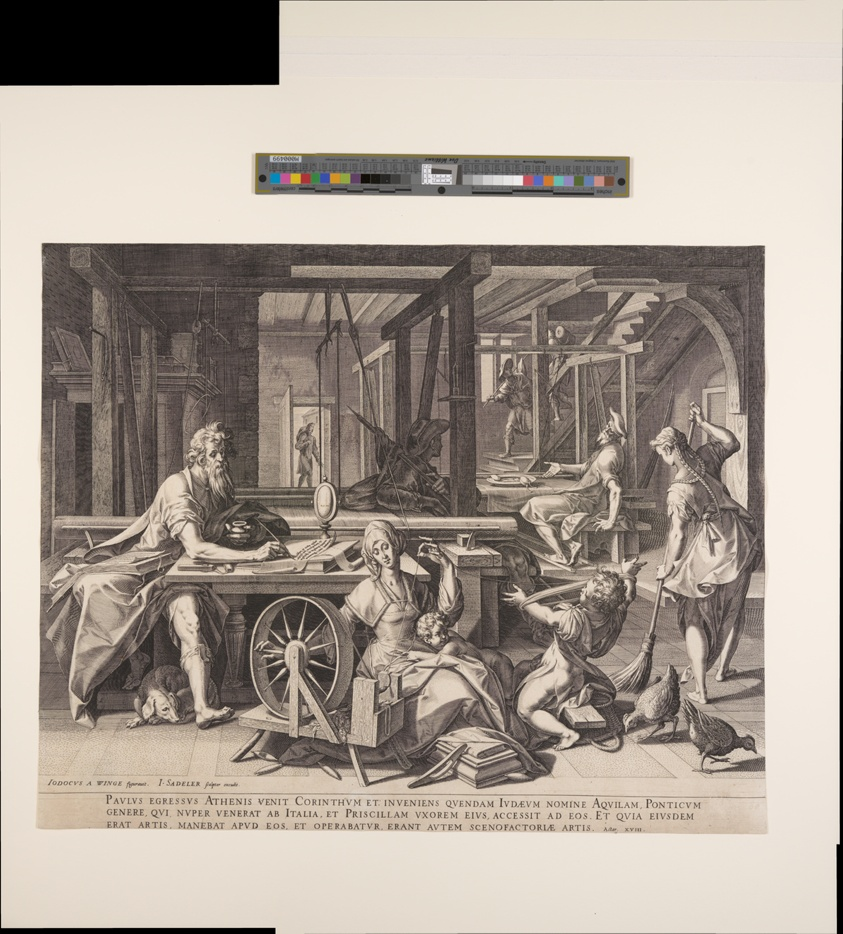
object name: Print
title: St. Paul at Corinth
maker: Jan Sadeler I (Flemish, 1550–1600); after Joos van Winghe (Flemish, 1544–1603)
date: c. 1590-1600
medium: Engraving on ivory laid paper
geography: Flanders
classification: engraving; paper; print; prints and drawing